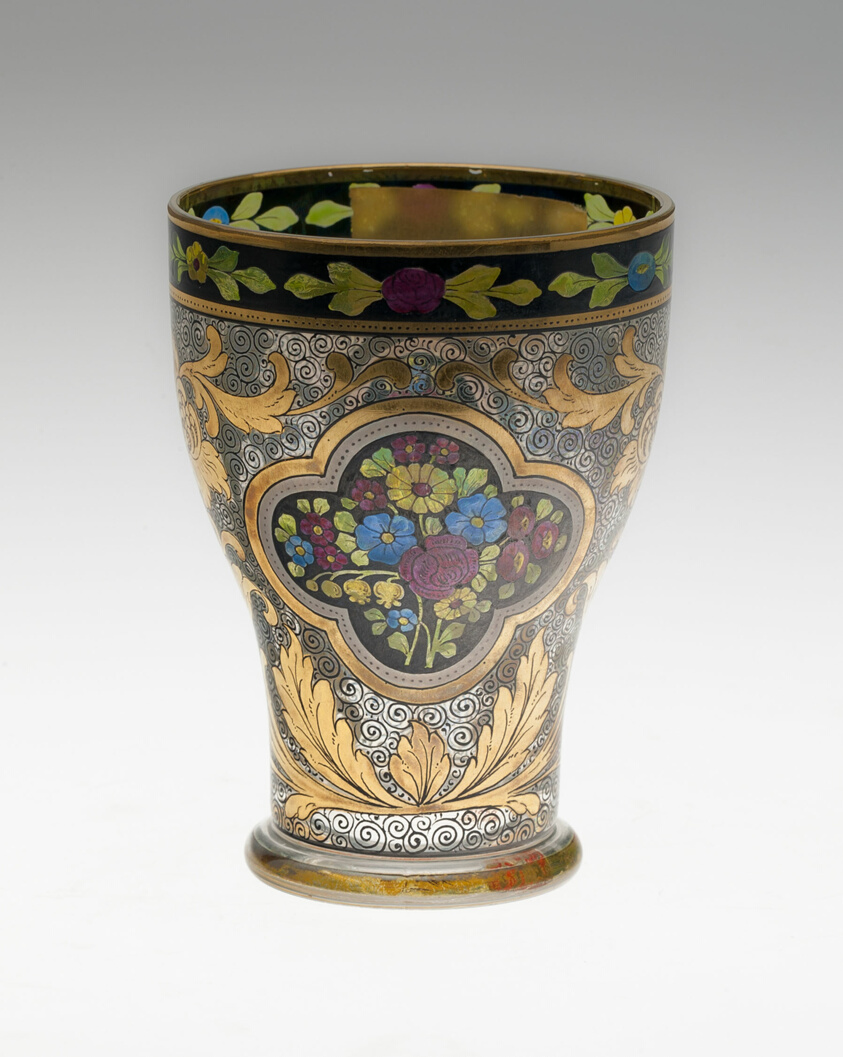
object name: Glass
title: Beaker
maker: Bohemia, Czech Republic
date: c. 1830/50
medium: Glass with polychrome enamels and gilding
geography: Bohemia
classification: drinking vessel; glass; european decorative arts